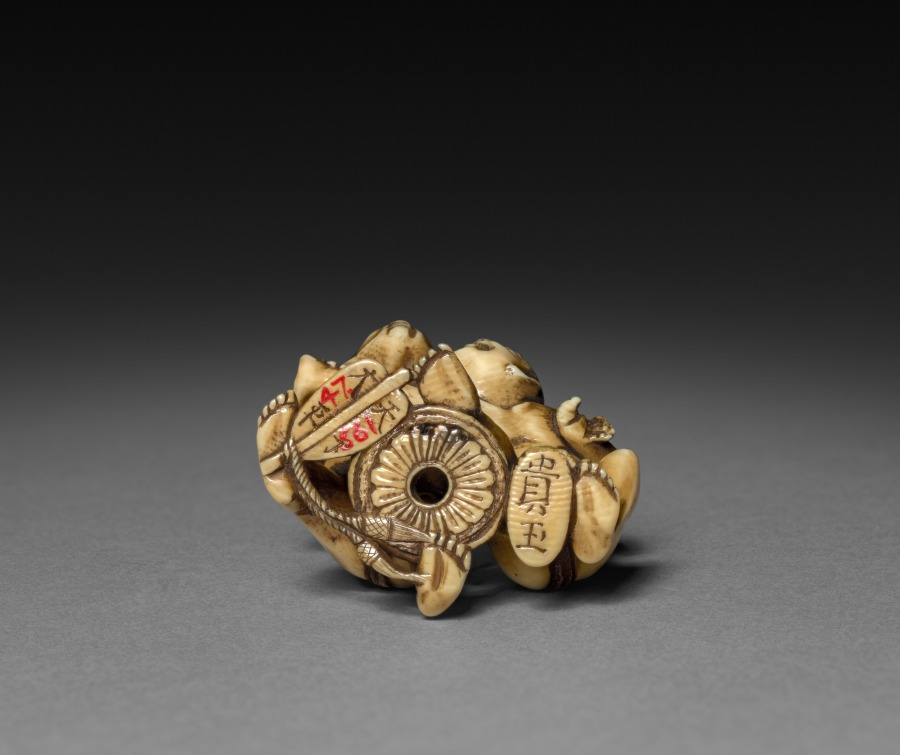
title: Two Wrestlers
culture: Japan, Edo period (1615–1868)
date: early to mid-1800s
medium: ivory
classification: Netsuke